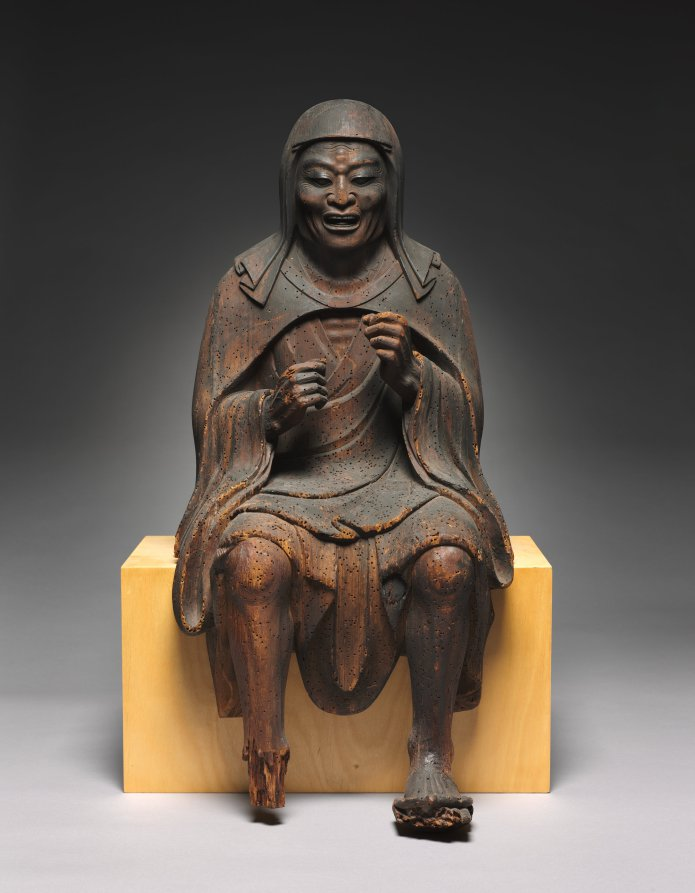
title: En no Gyōja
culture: Japan, Kamakura period (1185–1333)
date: 1200s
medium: wood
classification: Sculpture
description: This Buddhist monk is known as En no Gyōja, or “En the Ascetic” (legendarily 634–701), who is said to have founded Shugendō, a style of religious practice focused on performing challenging, rigorous tests of courage and devotion in mountainous settings.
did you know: This sculpture was once flanked by the demons Zenki and Koki (CMA 2012.40).